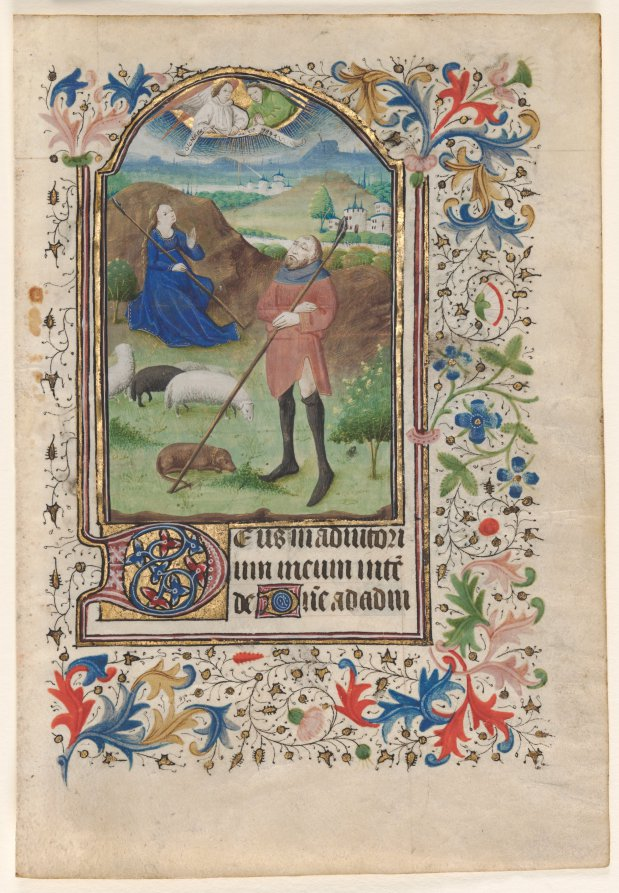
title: Leaf from a Book of Hours: Annunciation to the Shepherds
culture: France, Troyes?, 15th century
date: c. 1460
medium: ink, tempera and gold on vellum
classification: Manuscript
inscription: Deus in aduitorium meum intende...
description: The shepherd and shepherdess gaze up toward a pair of angels who are announcing that Christ has been born. A dog is curled at their feet while sheep graze around them. This anonymous painter had a highly personal style recognized by its facial types, architectural forms, and a love of sumptuous textile patterns. He has been associated with other books of hours that were produced in and for the city of Troyes in France.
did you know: Although we don't know the name of the artist, other leaves by the same individual have been identified in other collections.